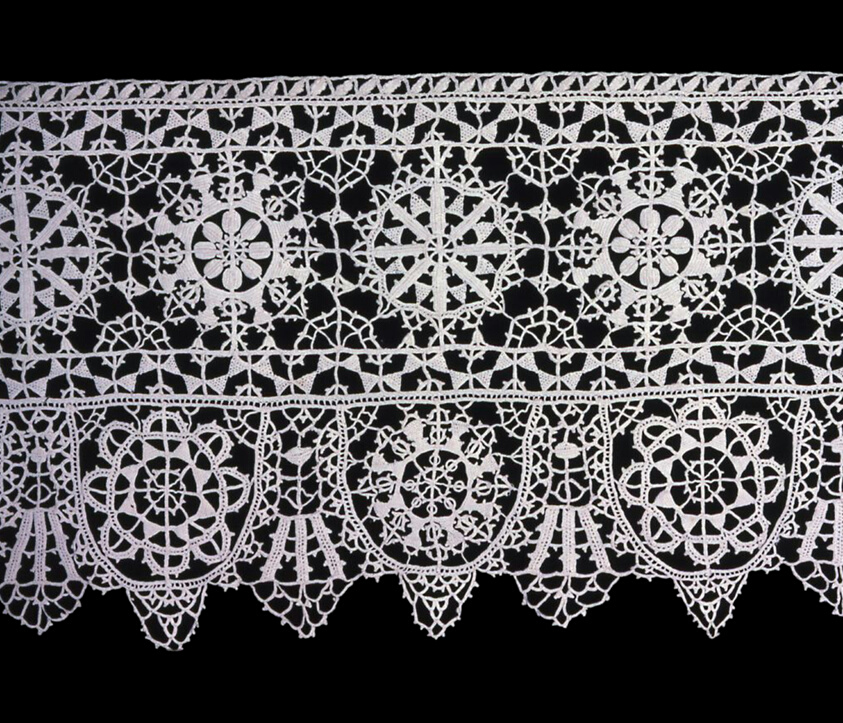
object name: Textile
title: Border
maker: Italy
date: 1601/25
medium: Linen, needle lace worked on a laid and plaited thread grid with detached points (with inserts of later date) Reticello pattern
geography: Italy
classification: textile; lace - needle